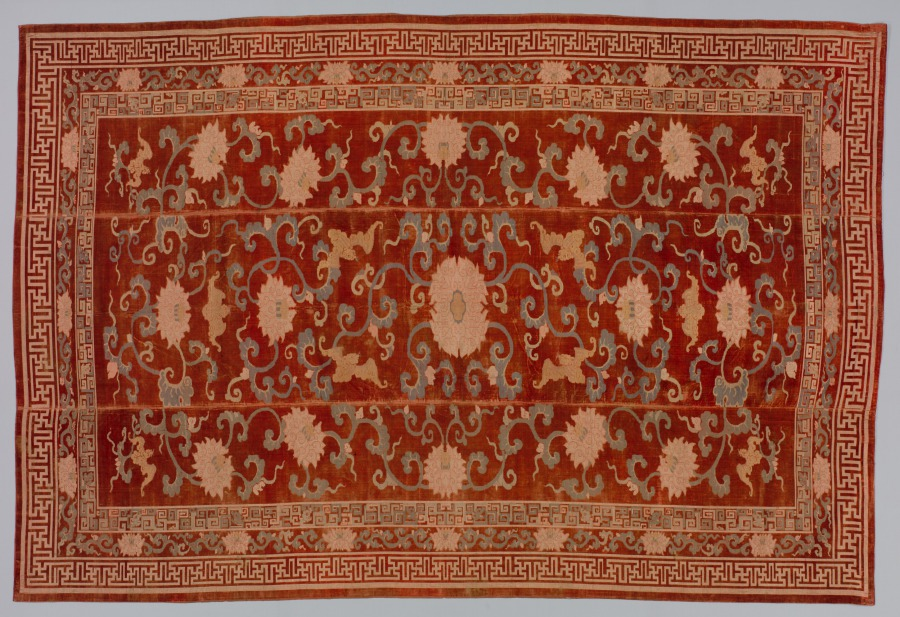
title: Velvet Brocade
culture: China, Qing dynasty (1644–1911), Qianlong reign (1736–95)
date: 1700s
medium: velvet brocade, gold thread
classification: Velvet